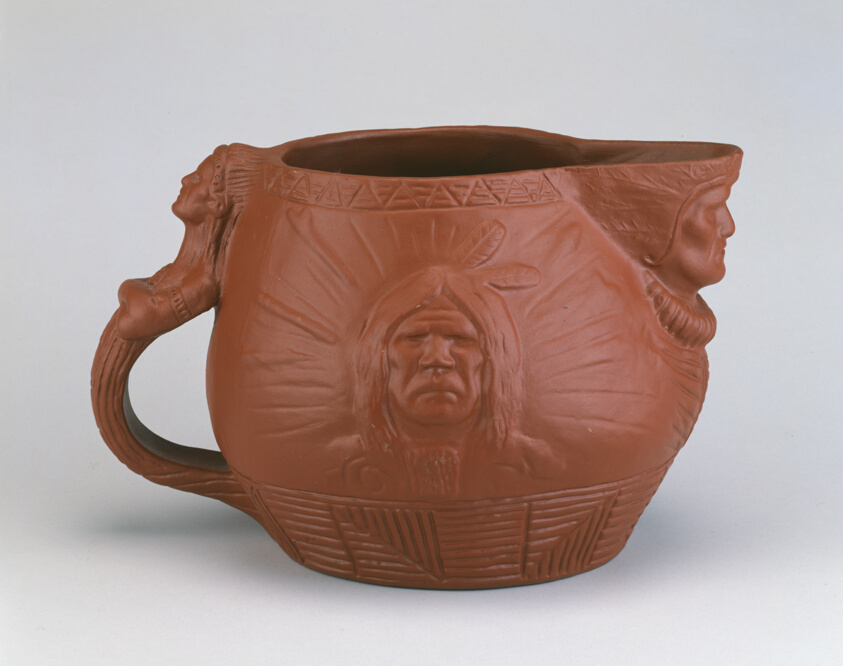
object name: Ceramics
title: Pitcher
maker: Designed by Edward Kemeys (American, 1843–1907); Made by Joseph Green (American, active 1890s); Burley & Co. (founded 1883); Chicago, Illinois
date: c. 1890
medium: Earthenware and glaze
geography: Chicago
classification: pitcher (vessel); vessel; earthenware; pottery; ceramics; american decorative arts; american arts; decorative arts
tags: American Indian, American West, dining, drinking